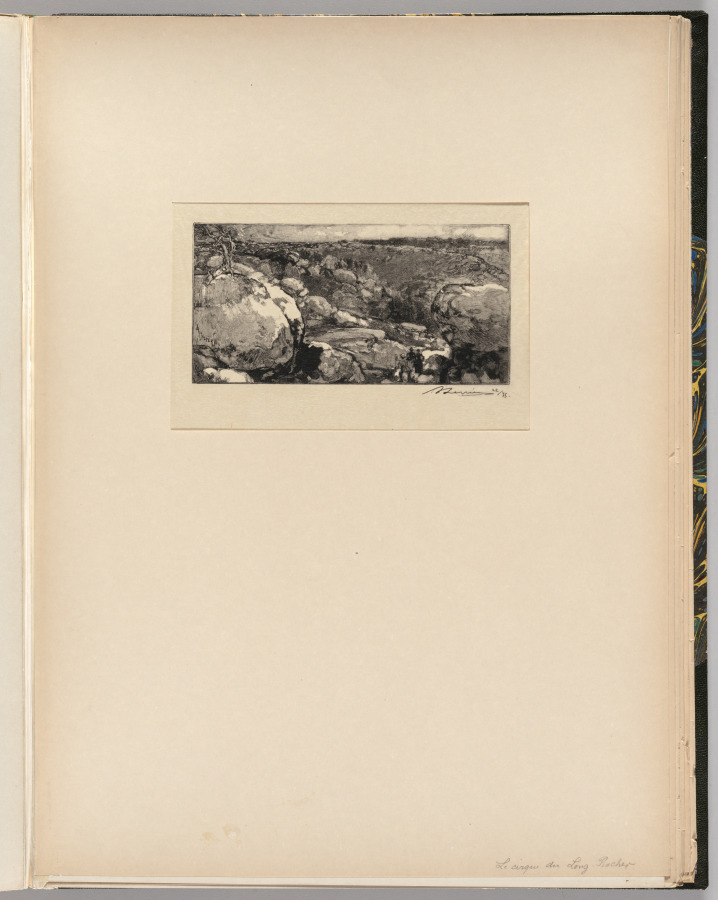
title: Fontainebleau Forest: The Cirque of Long-Rocher (La Forêt de Fontainebleau: Le cirque du Long-Rocher)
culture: France, 19th century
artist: Auguste Louis Lepère (French, 1849–1918)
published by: A. Desmoulins, Published in Revue Illustrée, 1887–90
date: 1888 (block engraved when reproduced in Revue Illustrée 1888), published 1908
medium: wood engraving from bound volume of 34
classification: Bound Volume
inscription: In block, lower left: A. LEPÈRE; below image, lower right, in black ink: ALepère 22/35; on window mat, lower right, in graphite: Le cirque du Long-Rocher